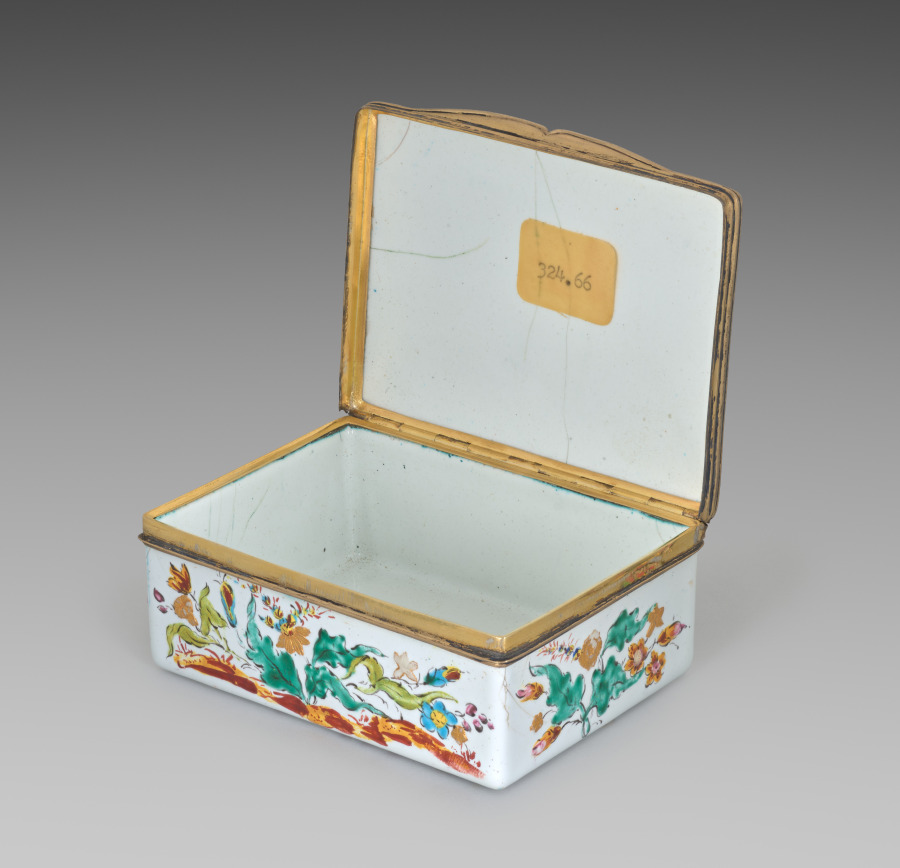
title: Box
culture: France, 18th century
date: 1749–50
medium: silver gilt and enamel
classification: Enamel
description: Chinoiserie in 18th-century France incorporated imitations of East Asian motifs, designs, and ornaments into European art. These imitations were often distorted by the European imagination and were not accurate representations of the cultures from which they drew inspiration. Elements of chinoiserie in this box can be seen primarily on the lid where enormous, vibrantly colored flowers tower over two crouching figures and a grouping of buildings.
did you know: The flower petals on the box lid are raised, an effect produced by drops of transparent enamel placed on the box’s surface that imitates polished gemstones or pearls.